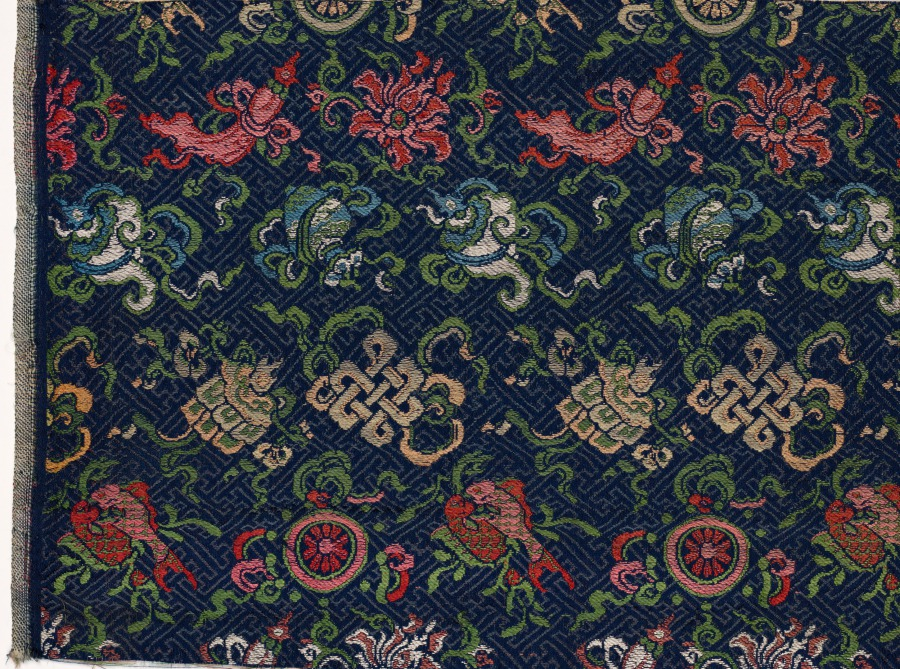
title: Fragment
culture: China or Japan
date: 1800s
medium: silk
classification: Textile